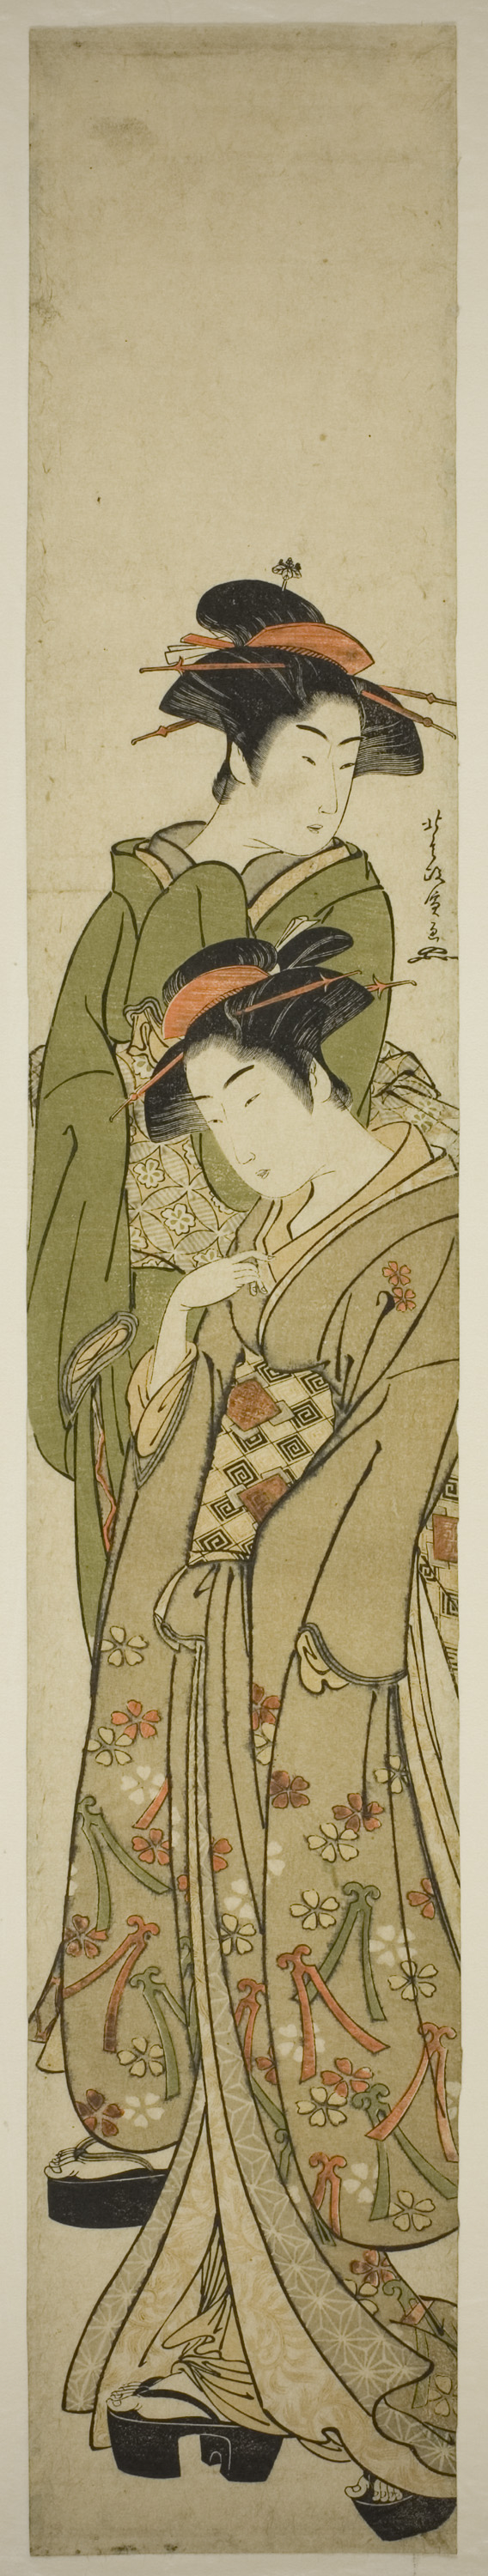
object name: Print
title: Two Women Taking a Stroll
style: Japanese (culture or style)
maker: Kitao Masanobu (Santo Kyoden); Japanese, 1761–1816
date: c. 1781/89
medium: Color woodblock print; hashira-e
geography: Japan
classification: woodblock print; print; asian art